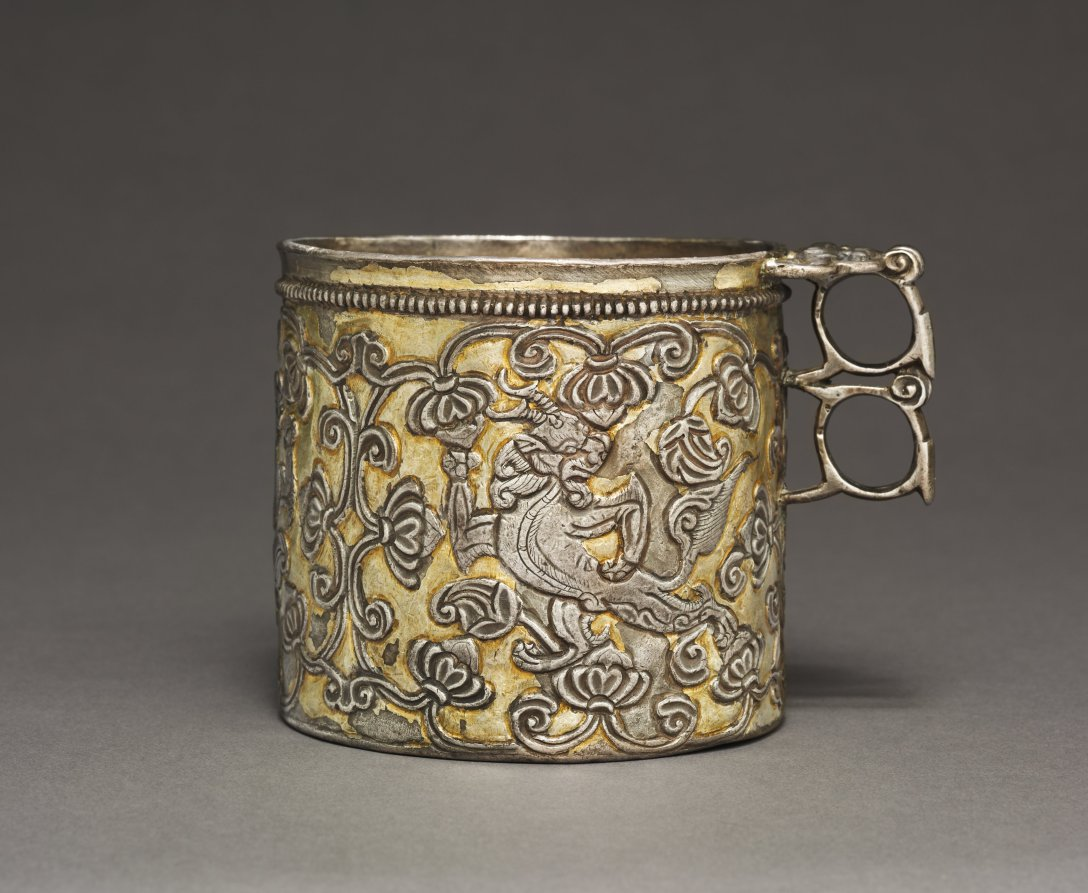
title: Beaker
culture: Central Asia (Sogdiana) or Tibet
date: c. late 600s–early 700s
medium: silver with gilding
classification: Silver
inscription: Inscribed on bottom of the cup: "Phan shing gong skyes gui sug byad (or byang)"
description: The circular shapes of the cup’s handle feature a flat edge on which the user rested their thumb for better grip, a design characteristic of silver objects made during the 700s by Sogdian artists, who traveled from Central Asia along international trade routes. An ownership inscription in Tibetan script on the underside of the cup identifies the vessel as a personal possession. The circles and lines carved below this inscription are likely measurements recording the weight of the silver used for the cup.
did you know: This cup depicts two lions and a lionlike animal with horns!